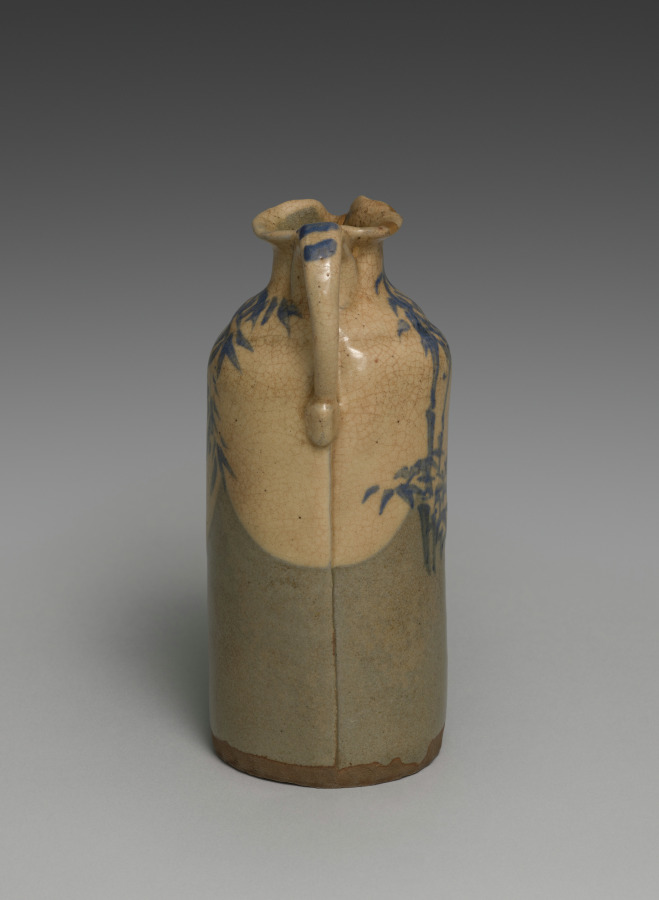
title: Sake Pourer with Bamboo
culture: Japan, Edo period (1615–1868)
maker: attributed to Seifū Yohei I (Japanese, 1801–1861)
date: c. 1844–57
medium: one of a pair of sake flasks; stoneware with white slip, underglaze blue and gold repair (kintsugi) (Kyoto ware)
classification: Ceramic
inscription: The storage box for the pair of vessels is inscribed and impressed with seals.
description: This pair of sake pourers adorned with with bamboo and bellflowers is attributed to the founder of the Seifū Studio, Seifū Yohei I (1801–1861). Yohei I, the lineage founder, was born to the Yasuda family in the city of Kanazawa, which faces the Sea of Japan. His home province of Kaga (in present-day Ishikawa Prefecture) produced its own ceramics, known as Kutani ware, but for his training as a potter, Yohei I chose Kyoto, which produced the more technically advanced porcelainware. He moved to Kyoto around the 1820s and became apprenticed to Nin’ami Dohachi, a leading potter in the city. He later struck out on his own, and it is likely that his teacher gave him the name Seifu Yohei. His works include many exquisitely painted copies of Chinese porcelain, and he also produced stoneware with overglaze color enamels that emulated works in the style of Ogata Kenzan (1663–1743) at which his teacher excelled.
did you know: Sake may be served heated or chilled, and, as with wine, the recommended serving temperature of sake varies greatly by type.